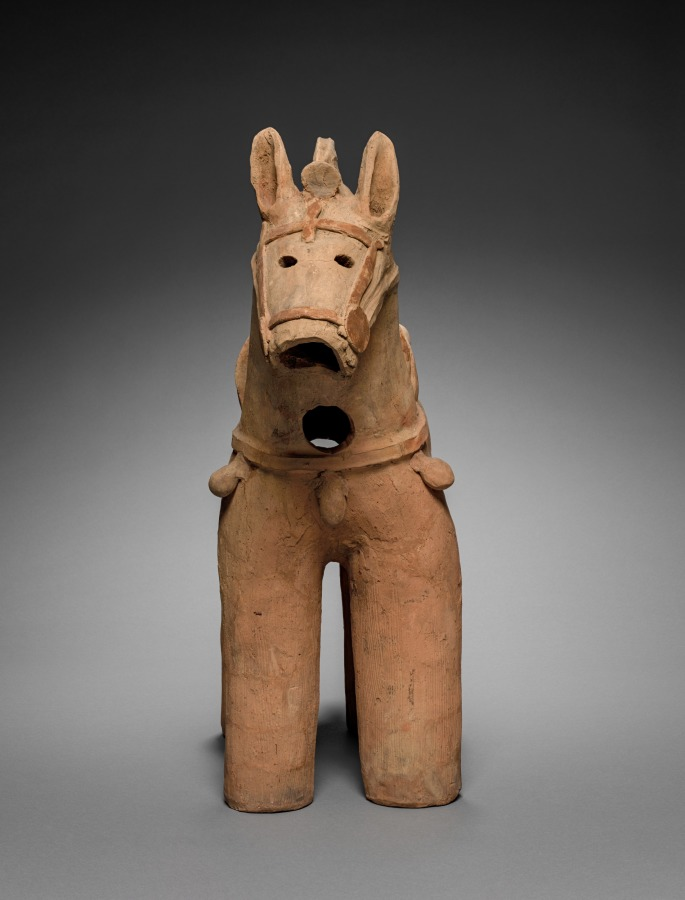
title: Haniwa Horse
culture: Japan, Kofun period (300–710 CE)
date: 400s–500s CE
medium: earthenware with traces of pigment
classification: Sculpture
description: This horse’s tack, with its round bells, resembles saddlery in fashion in Korea during the 400s–500s CE. Concurrent with mass migration from the Korean Peninsula, tombs covered with large earthen mounds similar to those on the Asian continent began to appear in Japan around the year 300 CE. Called “old mounds” (kofun), their surfaces were covered with hollow clay cylinders (haniwa). Sculptures of animals, buildings, and finally human figures followed, developing over the ensuing three centuries.